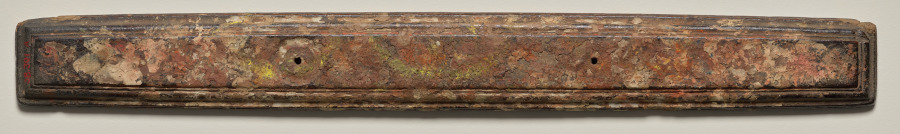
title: Top cover, from a Manuscript of the Perfection of Wisdom in Eight Thousand Lines (Ashtasahasrika Prajnaparamita-sutra)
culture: Eastern India, Bihar, Vikramashila Monastery. Paintings: Nepal, Kathmandu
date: Sunday, September 14, 1119 (year 239 of the Newar Samvat in the month of Ashvina)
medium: Covers: Gum tempera, colors, and paper on wood; pages: gum tempera and ink on palm leaves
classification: Painting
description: Pieces of paper, sandalwood paste, vermilion powder, and spices like turmeric and saffron were ritually added to the top cover of this manuscript during its veneration in ceremonies honoring the Buddha’s teachings. Additionally, this wooden cover would have protected the fragile palm-leaf pages inside. A cord attached to a peg on the left side of the cover would have passed through the two binding holes and wrapped around the manuscript in order to evenly exert pressure and keep the leaves tight. The entire volume would have also been wrapped in cloth to further protect it from the elements and insect damage. Books in this format are very portable, as evidenced by the manuscript’s northward journey from the Vikramashila Monastery in eastern India to the Kathmandu Valley in Nepal.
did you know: Wooden covers of pothi manuscripts are called patli.